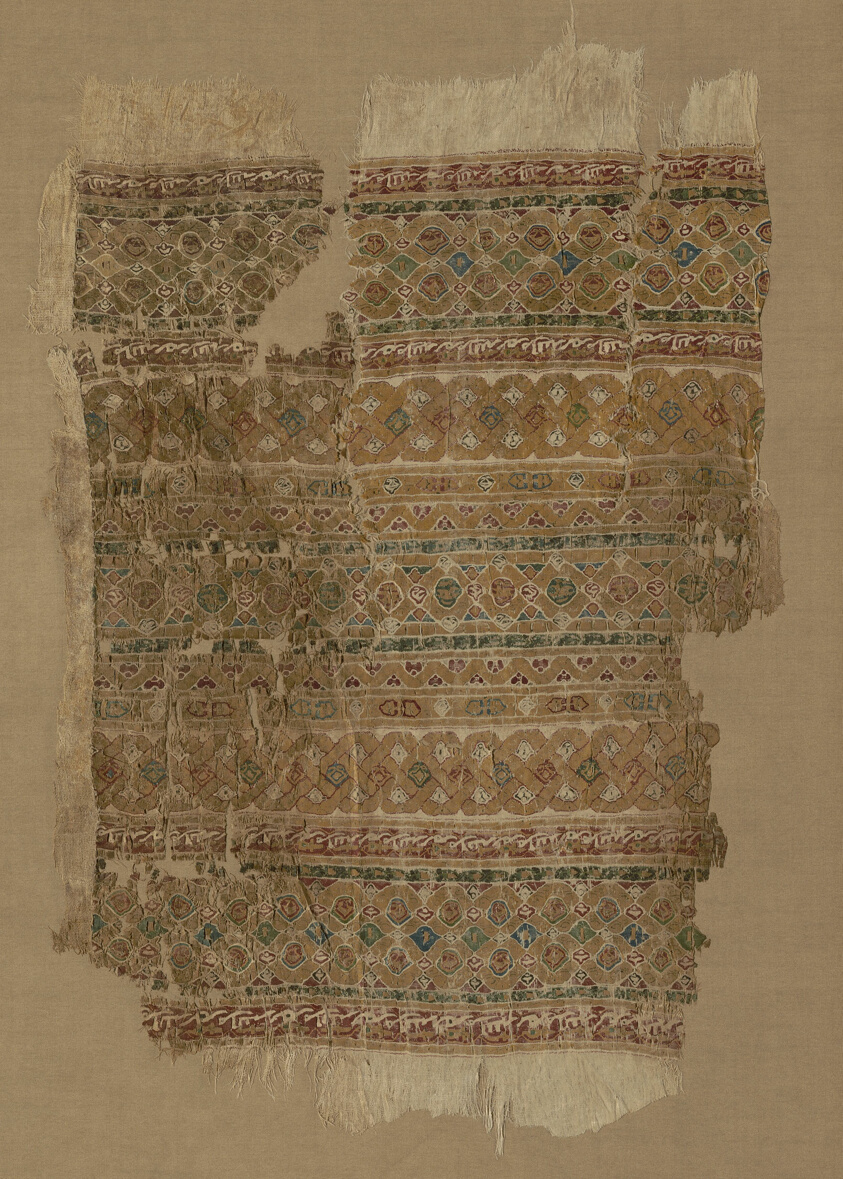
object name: Textile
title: Fragment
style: fatimid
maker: Egypt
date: Fatimid period (969–1171), late 11th/early 12th century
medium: Silk, tapestry weave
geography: Egypt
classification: textile; weaving